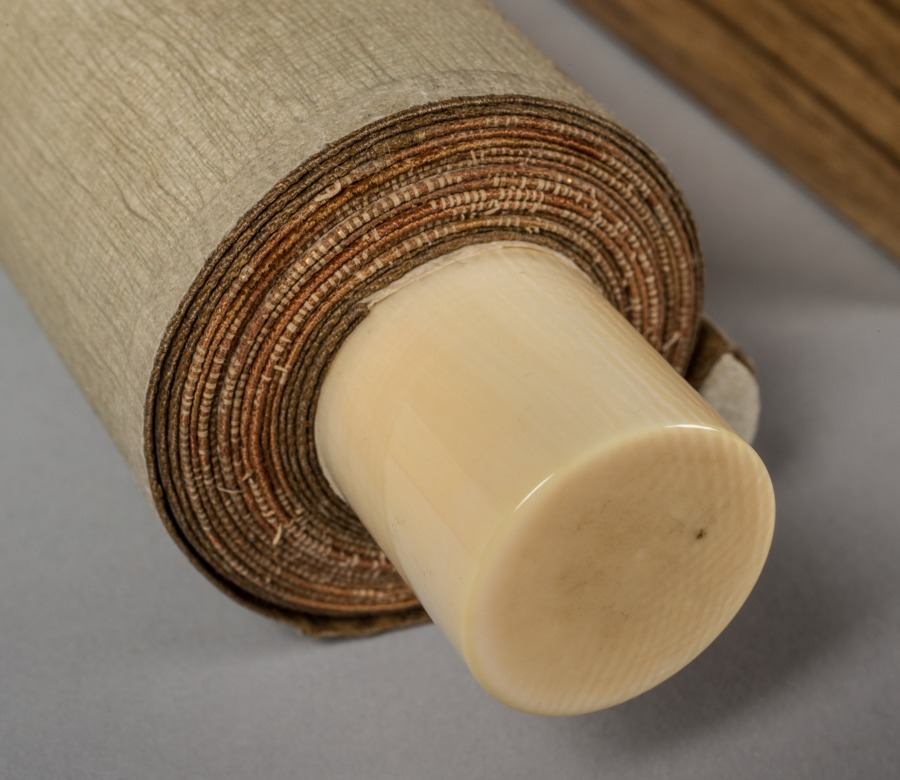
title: Beauty (Bijin)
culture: Japan, Edo period (1615–1868)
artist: Katsushika Hokusai (Japanese, 1760–1849)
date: c. 1775–1849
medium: hanging scroll; ink and color on paper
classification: Painting